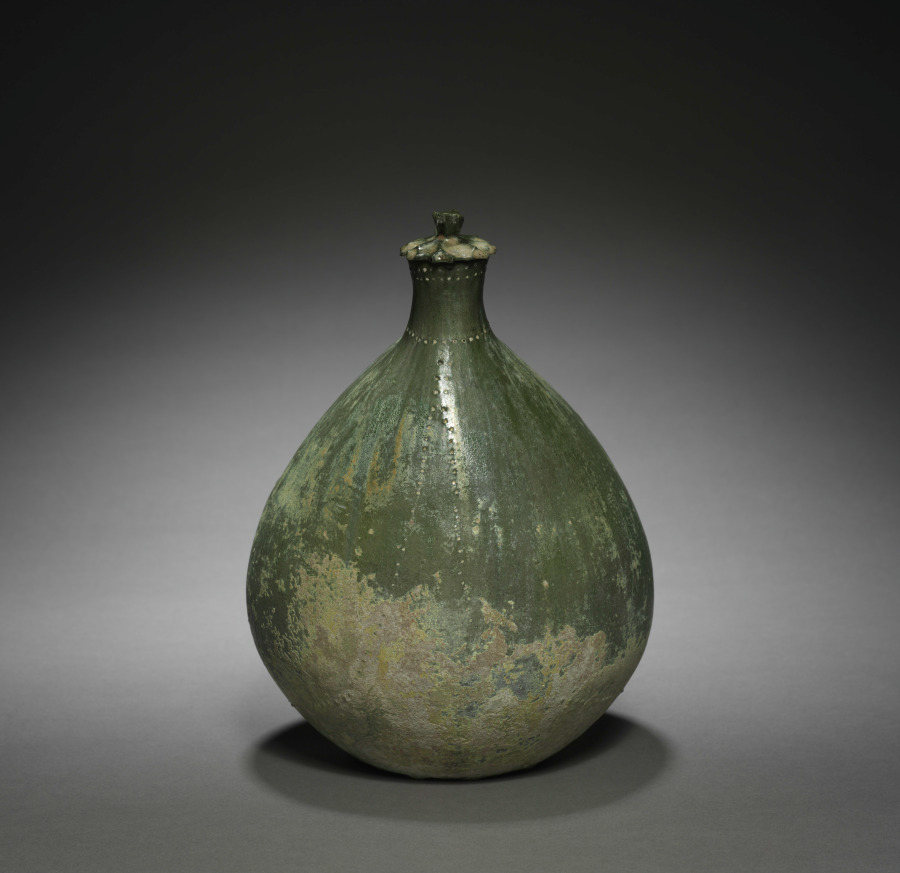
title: Leather Bag-Shaped Flask with Cover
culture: Northeast China, Liao dynasty (916-1125)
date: 916–1125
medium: earthenware with green glaze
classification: Ceramic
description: Flasks like these derive their shapes from leather bags; even the edges are finely rouletted to resemble the seams of sewn leather. These were used by the nomadic Khitan people who established the Liao kingdom in Inner Mongolia, Manchuria, and North China. Such wares represented the Liao adoption of the Tang Chinese ceramic tradition, and yet they expressed ethnic identity and new innovations resulted from the cultural borrowing.